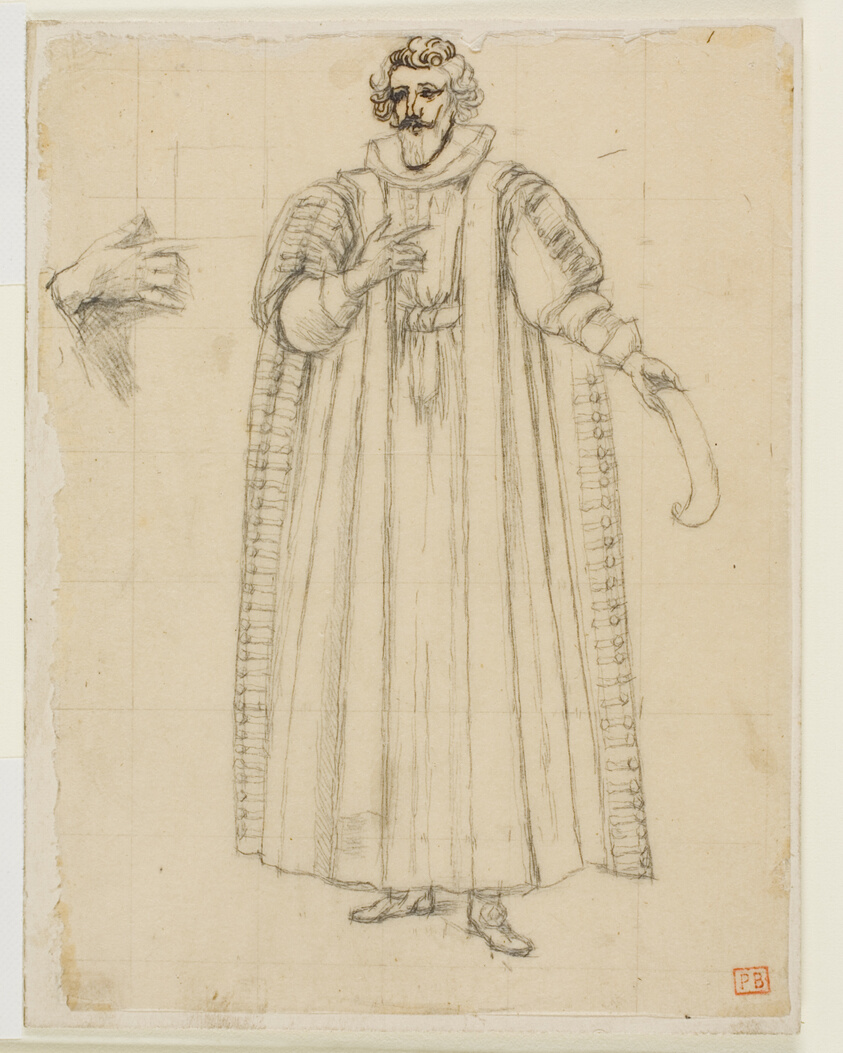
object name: Drawing and Watercolor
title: Portrait of François Viète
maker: Charles Meryon (French, 1821-1868); after Daniel Rabel (French, c.1578-1637)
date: 1861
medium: Graphite and ink on ivory wove tissue laid down on ivory wove board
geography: Paris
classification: graphite; drawings (visual works); prints and drawing